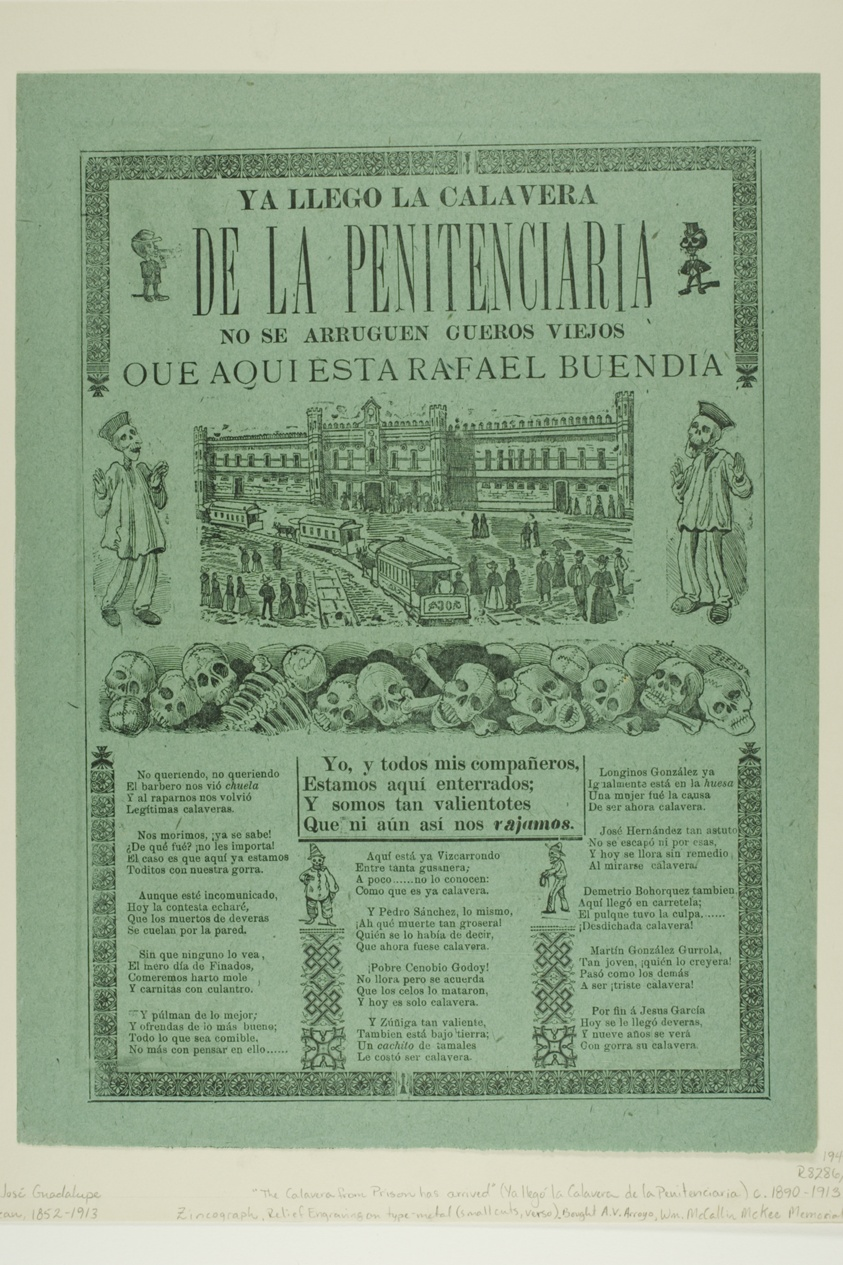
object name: Print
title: The Calavera of the Penitentiary Has Just Arrived. Don't Shrivel Up, Old Skins, Here is Rafael Buendia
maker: José Guadalupe Posada (Mexican, 1852-1913)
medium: Photo relief etching on green wove paper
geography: Mexico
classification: relief etching; print; prints and drawing